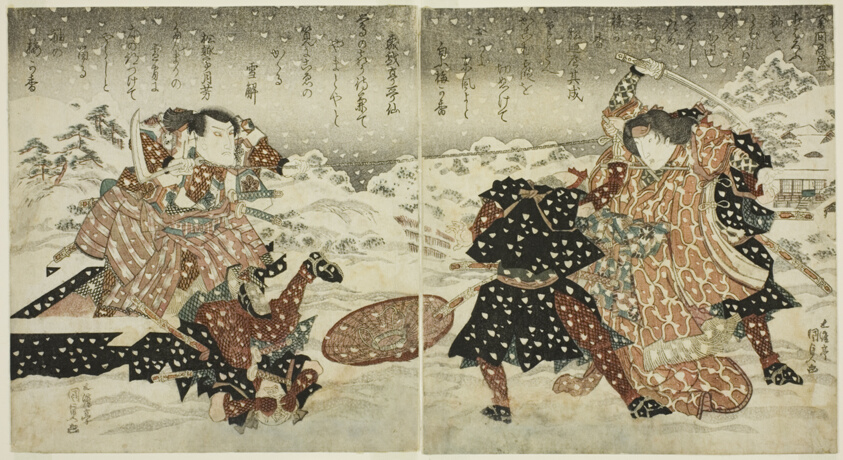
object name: Print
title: Warriors Fighting in the Snow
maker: Utagawa Kunisada I (Toyokuni III) (Japanese, 1786-1865)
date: 19th century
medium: Color woodblock print; shikishiban diptych; surimono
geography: Japan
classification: print; asian art